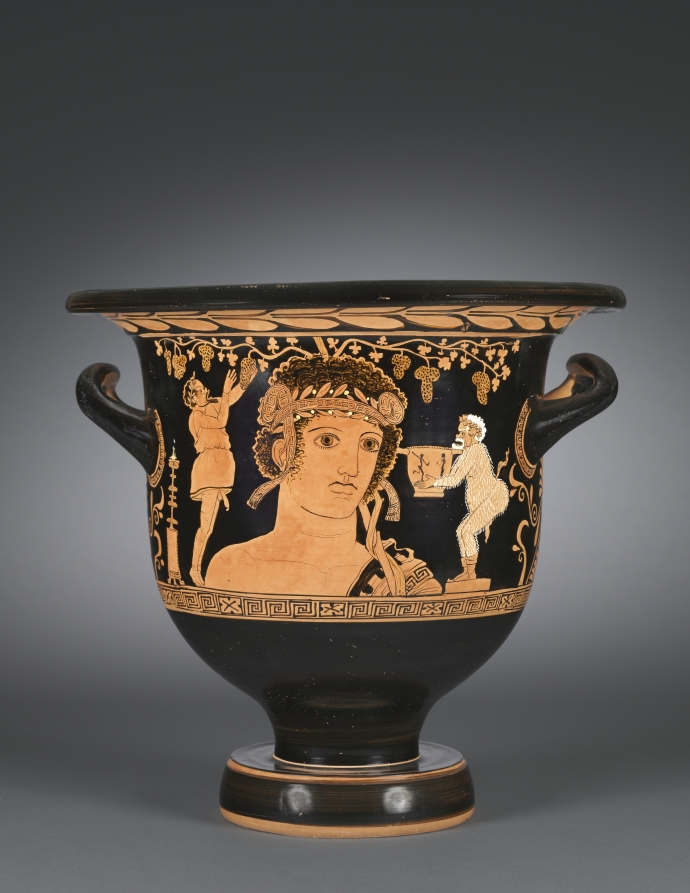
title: Red-Figure Bell-Krater (Mixing Vessel): Bust of Dionysos and Comic Actors (A); Dionysos, Satyr, Maenad (B)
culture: South Italian, Apulian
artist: attributed to Choregos Painter (South Italian, Apulian, active c. 390–380 BCE)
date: c. 390–380 BCE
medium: ceramic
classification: Ceramic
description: Dionysos, the god of wine, theater, and the mysteries, dominates both sides of this bell-krater, a vessel for mixing water and wine. On the front, he appears in bust form, wearing a fillet and laurel wreath. Over his shoulder and behind his head rests his thyrsos, sprouting grapevines. Comic actors, identifiable by their masks and padded costumes, flank the colossal bust, stretching for a bunch of grapes on the left and holding a large skyphos (wine cup) on the right. On the reverse, Dionysos marches in procession with his retinue, a satyr and maenad.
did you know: The large bust of Dionysos may represent a stage prop or symbolize the multifaceted god.